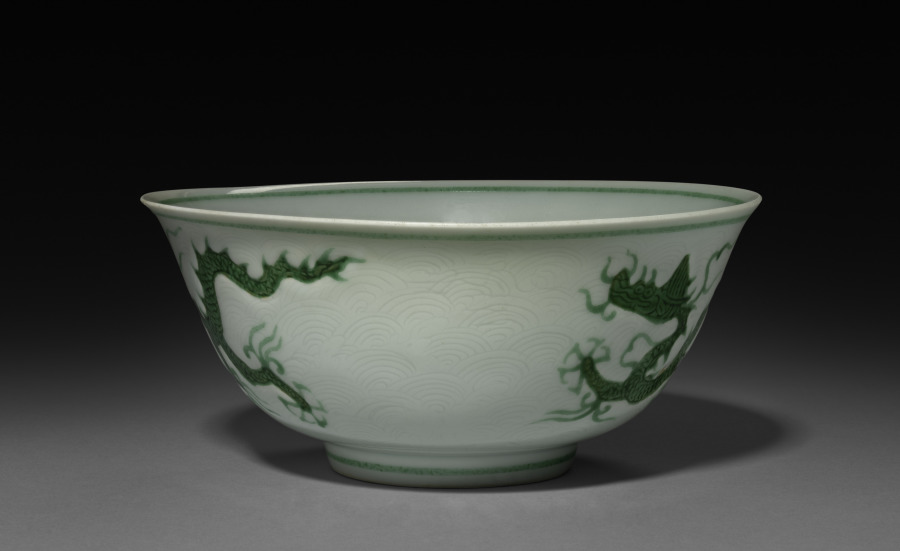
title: Bowl with Dragons in Waves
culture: China, Jiangxi province, Jingdezhen kilns, Ming dynasty (1368-1644), Zhengde mark and reign (1506-21)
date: 1506–21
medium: porcelain with incised decoration and green overglaze enamel and resist enamel decoration on biscuit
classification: Ceramic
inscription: 大明正德年製